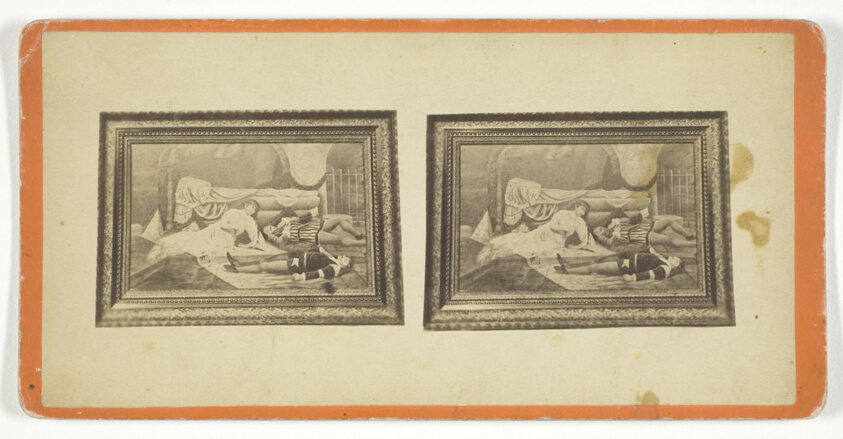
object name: Photograph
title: Untitled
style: 19th century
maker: C. H. Wareham; American, active late 19th century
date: late 19th century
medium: Albumen print, stereo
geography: Illinois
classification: photography; photograph